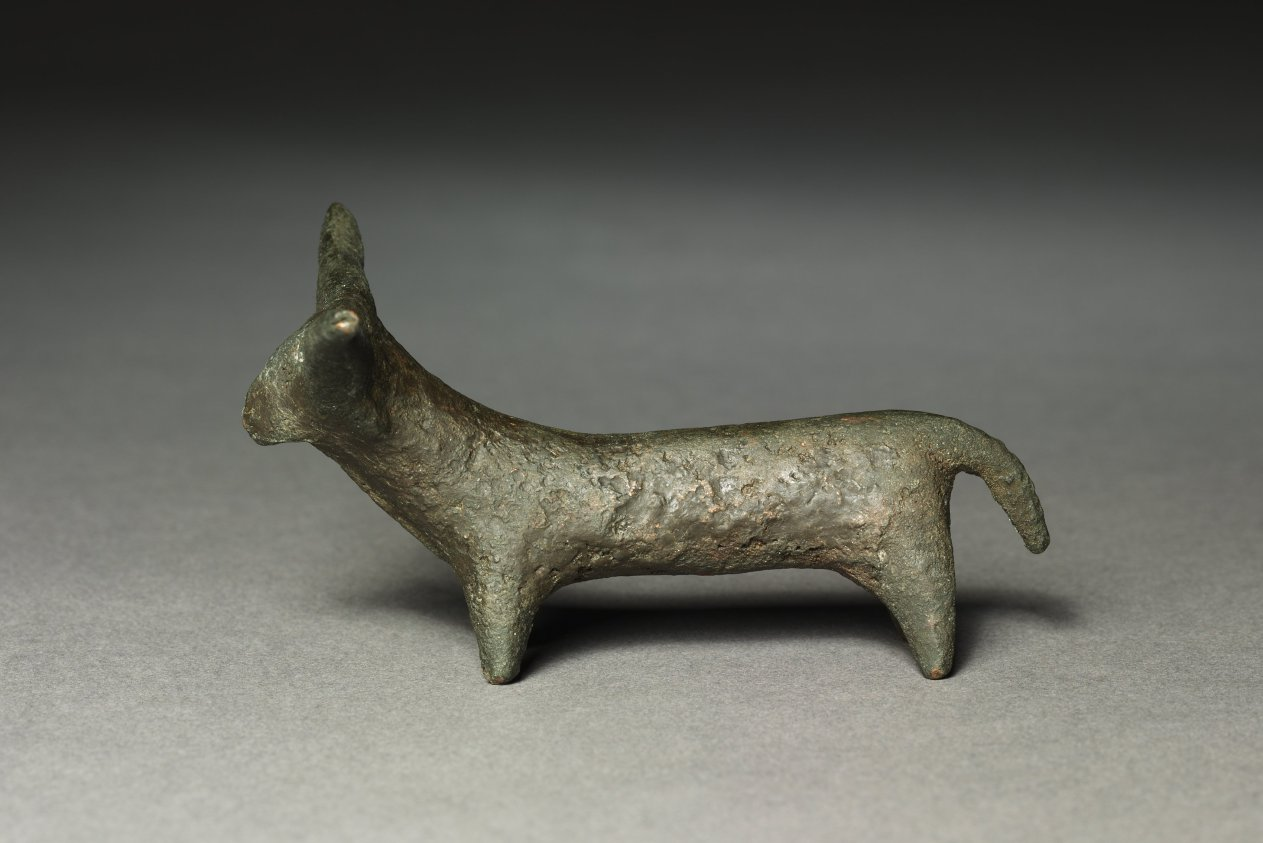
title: Standing Bronze Bull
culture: probably Anatolia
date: late 3000s BCE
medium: bronze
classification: Sculpture